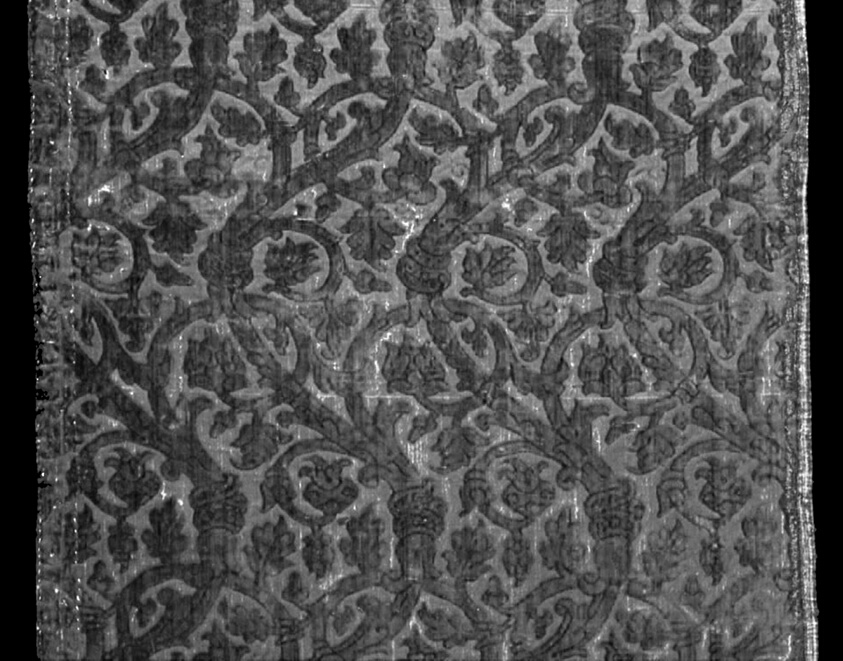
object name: Textile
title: Panel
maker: Italy, Florence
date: 16th century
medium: Silk, warp-float faced satin weave with supplementary pile warps forming cut and uncut voided velvet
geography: Florence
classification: textile; weaving - velvet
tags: foliage